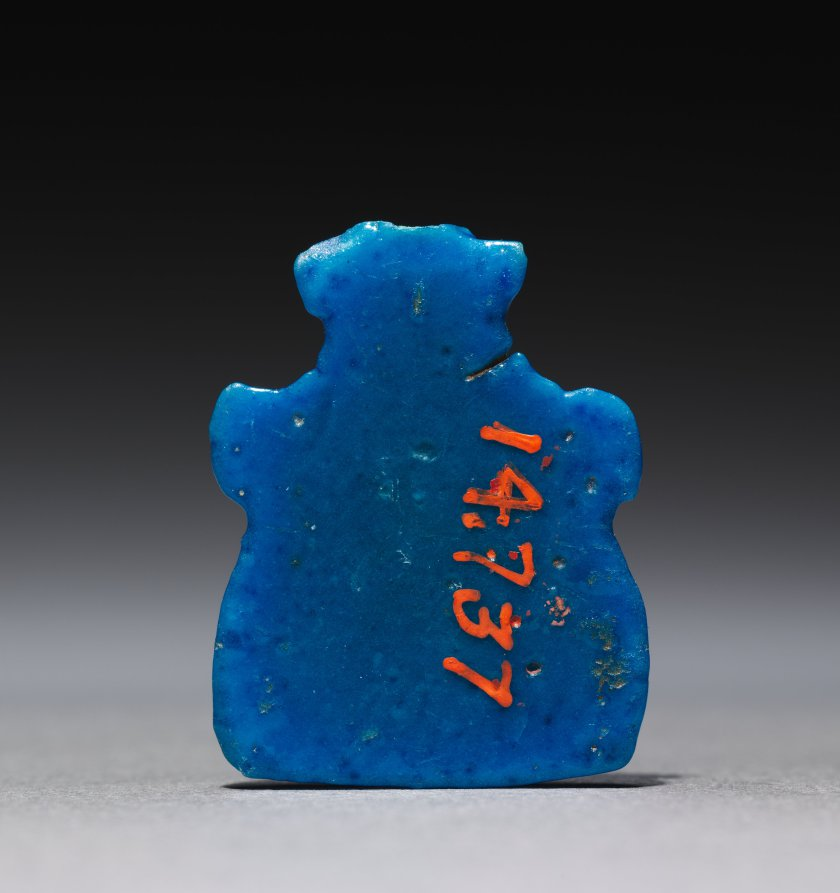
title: Bes Head Amulet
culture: Egypt, Third Intermediate (1069–715 BCE) or later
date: 1069–715 BCE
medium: turquoise blue faience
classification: Amulets